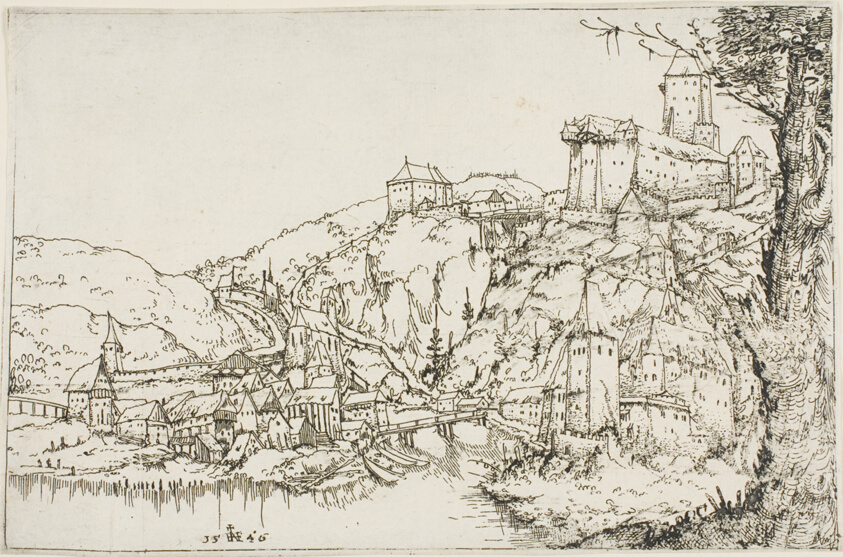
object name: Print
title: Landscape with River, Town and Castle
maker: Augustin Hirschvogel (German, 1503-1553)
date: 1546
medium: Etching on paper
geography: Germany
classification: etching; print; prints and drawing